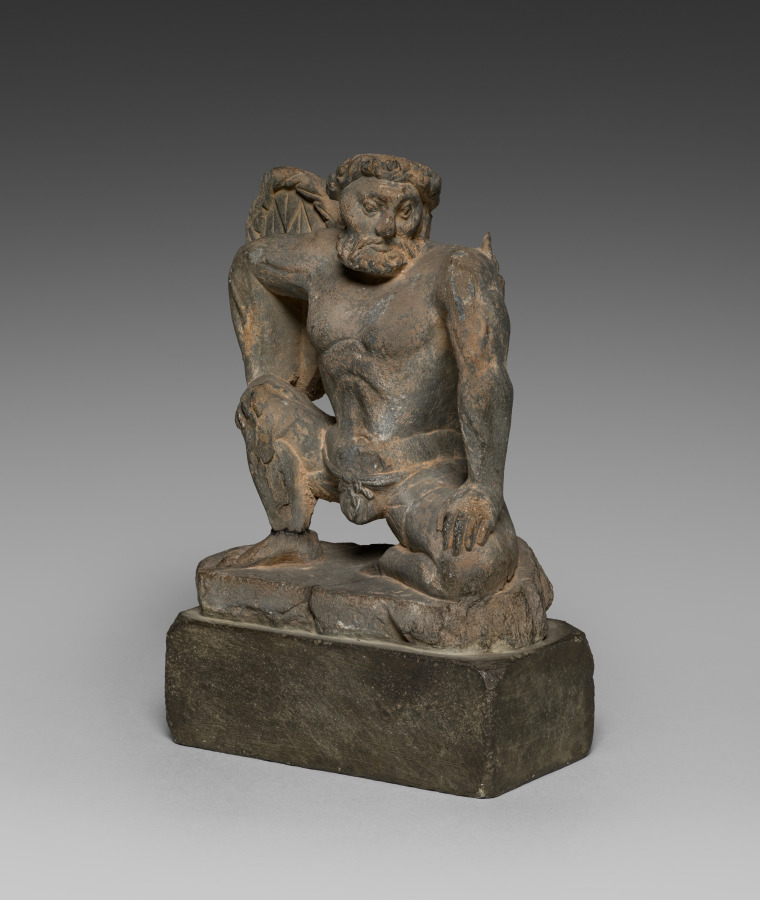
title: Winged Atlas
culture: Pakistan, Gandhara, Kushan period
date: c. 100s–200s CE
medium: gray schist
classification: Sculpture